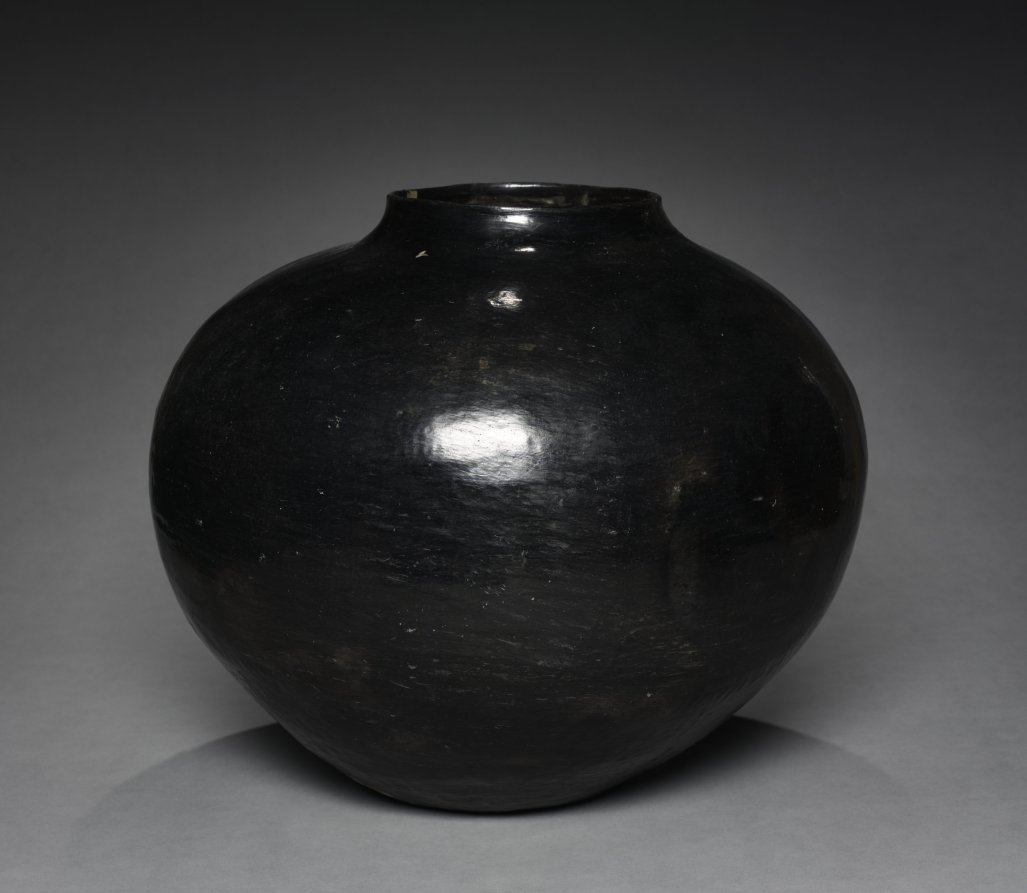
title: Storage Jar, Half- Fanega Size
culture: Southwest, Pueblo, Santa Clara, Post- Contact Period, 19th century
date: 1880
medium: reduction-fired (blackware)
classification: Ceramic